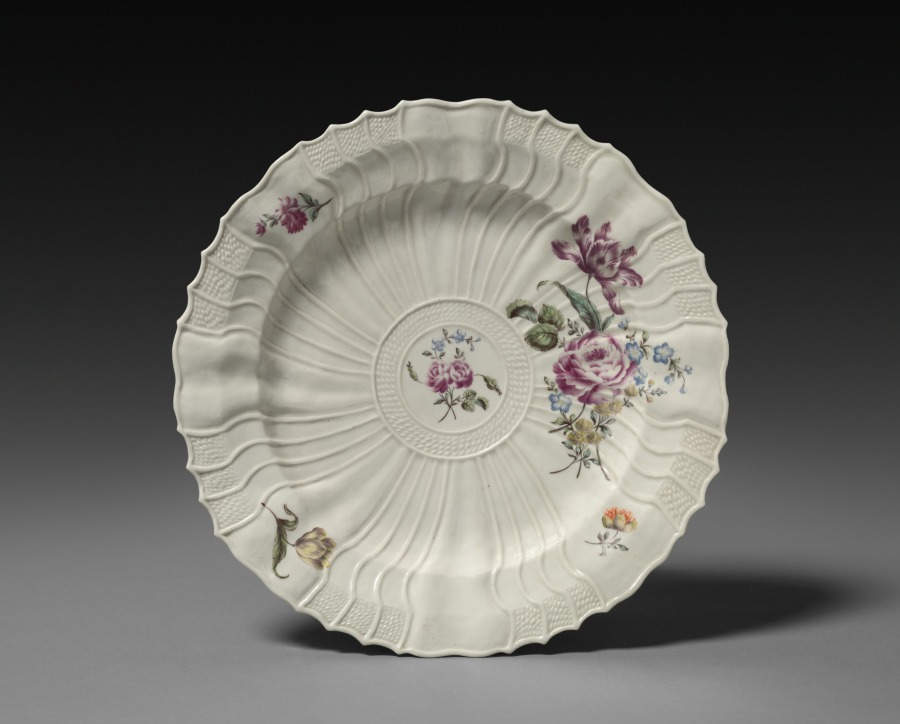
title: Plate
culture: Belgium, Tournai, 18th century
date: c. 1750–1775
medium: porcelain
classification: Ceramic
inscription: incised on bottom: 4.